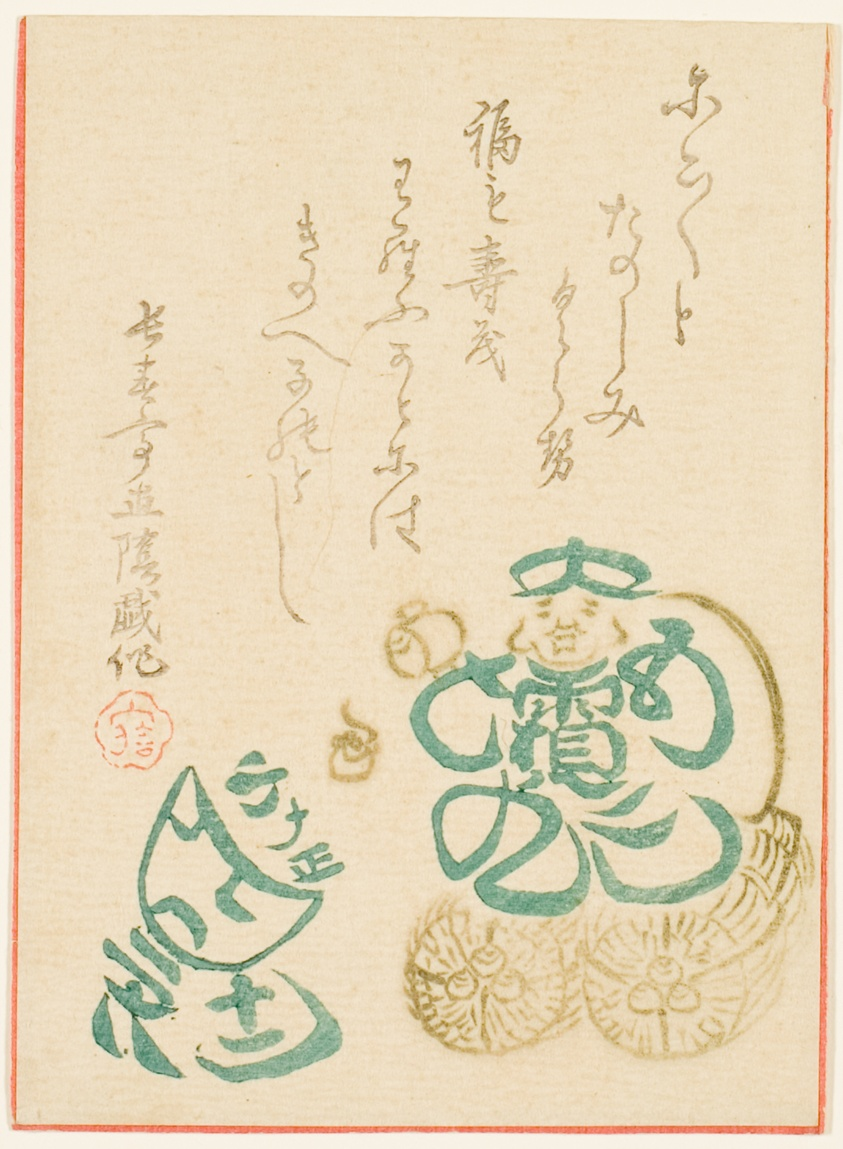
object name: Print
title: Egoyomi Daikoku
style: Japanese (culture or style)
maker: Choshuntei Naokage; Japanese, active 19th century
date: 1864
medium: Color woodblock print; surimono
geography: Japan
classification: woodblock print; print; asian art